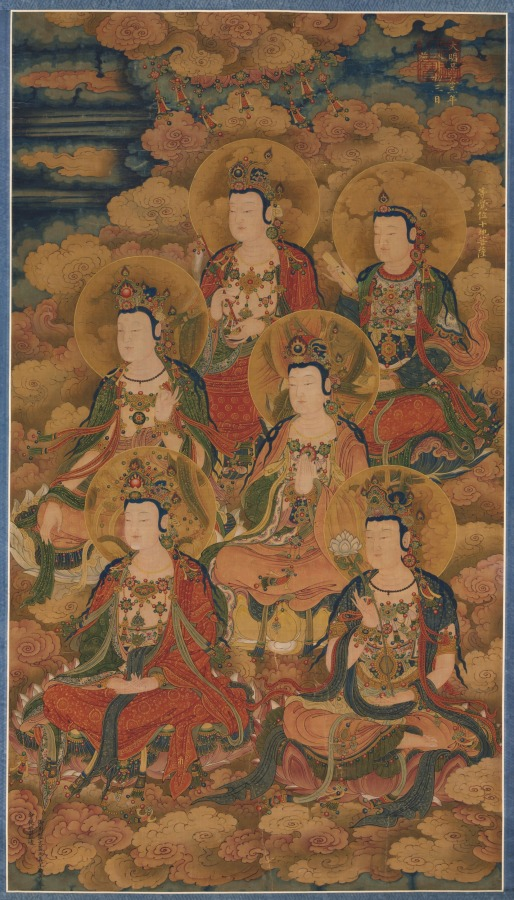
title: The Bodhisattvas of the Ten Stages in Attaining the Most Perfect Knowledge; The Eight Hosts of Deva, Naga, and Yakshi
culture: China, Ming dynasty (1368–1644)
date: 1454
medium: Pair of hanging scrolls; ink and color on silk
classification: Painting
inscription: 大明景泰五年八月初三日施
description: The grandest of the Buddhist mortuary rites is the Water-Land (shuilu) ritual. This esoteric ceremony is conducted for the salvation of “all souls of the dead on land and sea.” The ostentatious ritual was performed for imperial ancestors and high officials from the Song (960–1279) to the Ming dynasties and drew large crowds. On the second day of the weeklong ceremony, paintings are hung in the inner altar. These two scrolls belong to a set of 36 Water-Land ritual paintings that are the finest works of their types known from the Ming period. With their bright, opaque color and fine-line gilt decoration intact and unfaded, both paintings share a remarkable state of preservation. In the upper right corner of each painting is an imperial seal and an inscription in gold reading: Donated on the third day of the eighth month in the fifth year of the Jingtai reign (1454) of the Great Ming. Written in ink in the lower left corner is the record that they were made on imperial order, probably to present them to the Da Longfu monastery in Beijing. One scroll represents the Eight Hosts of Celestial Nagas and Yakshis as described in the Lotus Sutra. The other represents Bodhisattvas of the Ten Stages of Enlightenment undergoing the final processes toward Buddhahood. The sinuous curves of scarf and drapery, the layering of garments, and the minute detail all reflect the opulent visual atmosphere that surrounded the Ming worshipper in temples and spirit halls throughout the country.